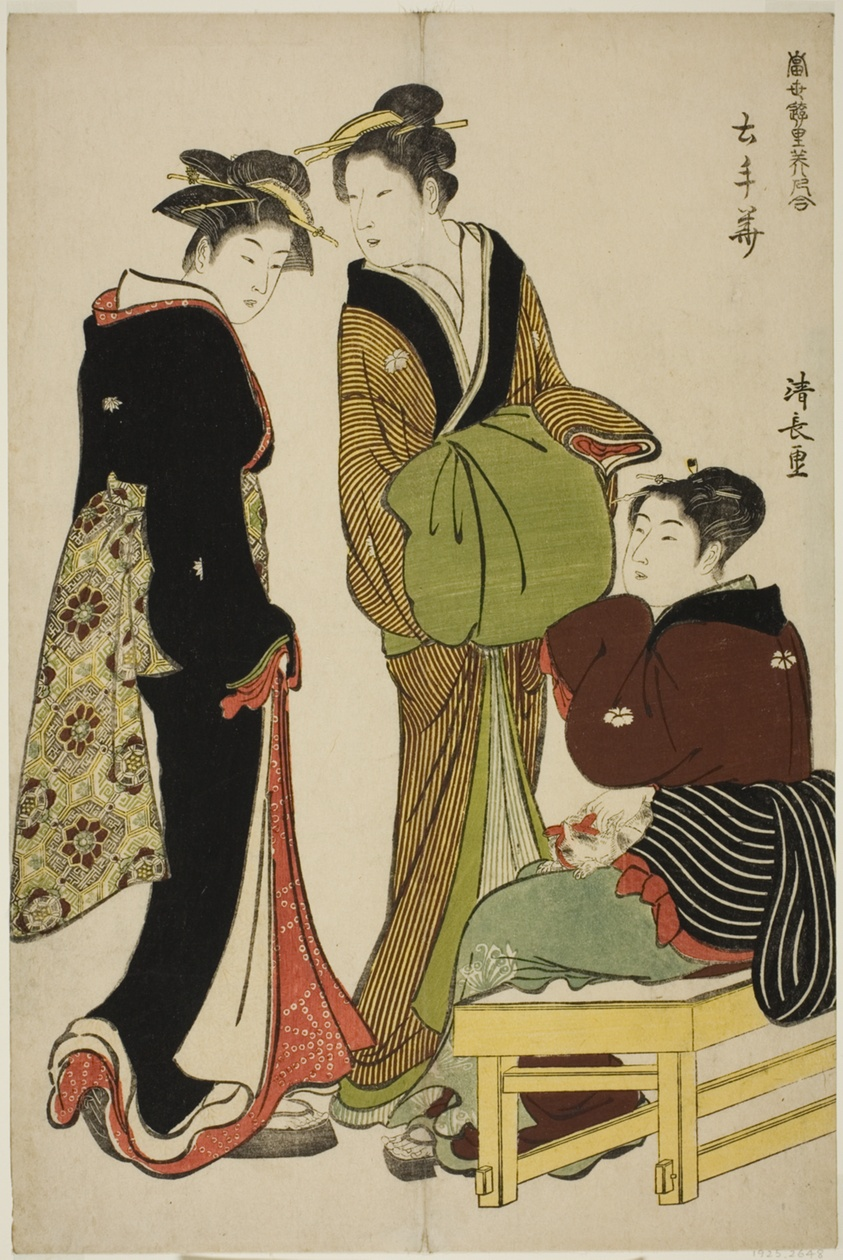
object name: Print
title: Flowers of the Doteshita District (Dotebana), from the series "A Collection of Contemporary Beauties of the Pleasure Quarters (Tosei yuri bijin awase)"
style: Japanese (culture or style)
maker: Torii Kiyonaga (Japanese, 1752-1815)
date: c. 1783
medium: Color woodblock print; oban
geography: Japan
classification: woodblock print; print; asian art